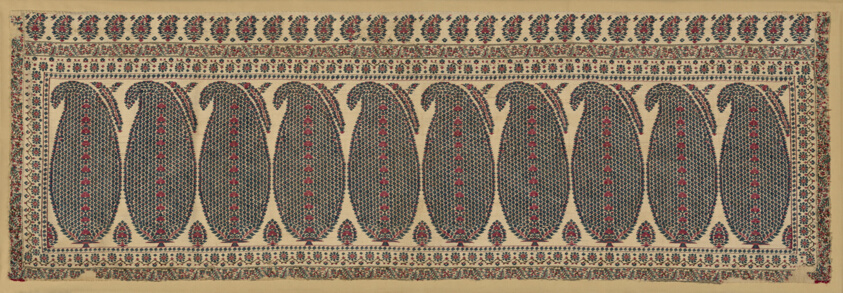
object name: Costume and Accessories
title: Shawl End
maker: India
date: c. 1805–10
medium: Wool, twill tapestry weave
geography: India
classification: weaving; costume